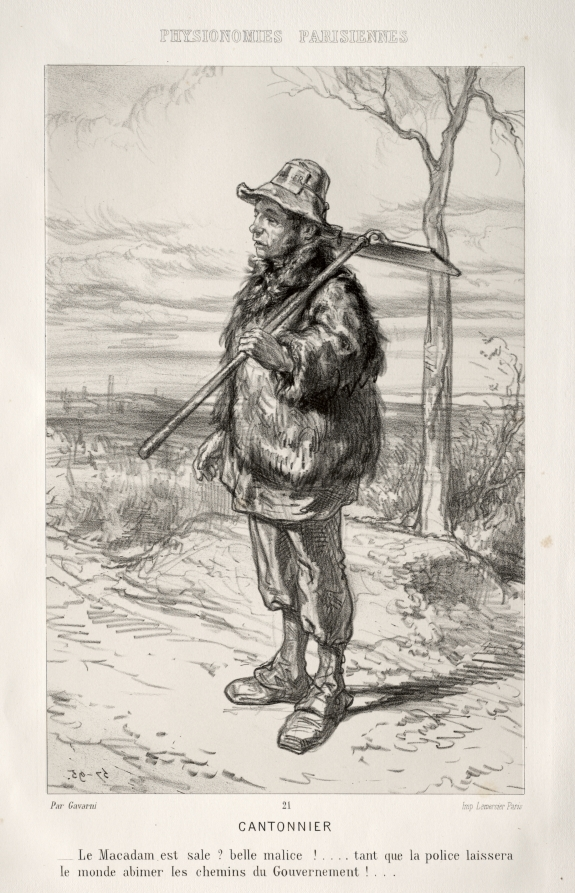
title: Cantonnier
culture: France, 19th century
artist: Paul Gavarni (French, 1804–1866)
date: c. 1857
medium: lithograph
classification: Print